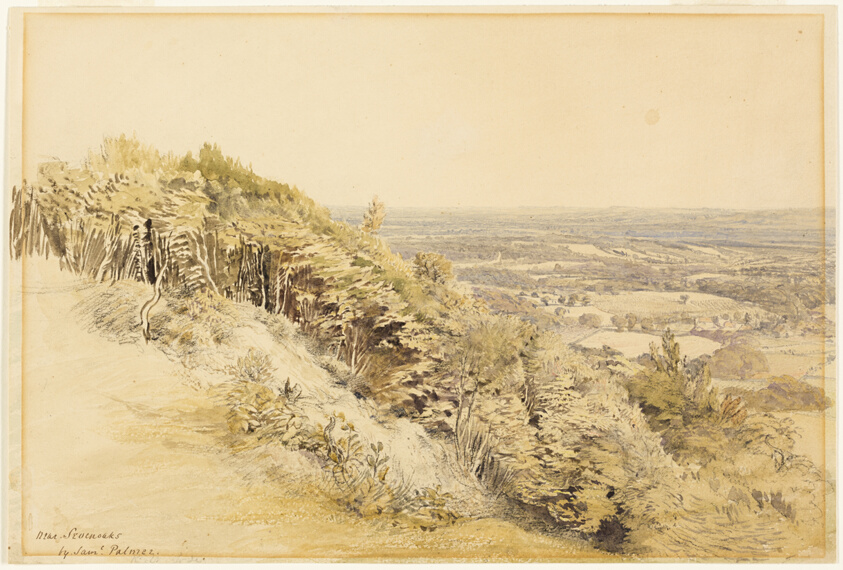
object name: Drawing and Watercolor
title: View from Wilmots Hill, Kent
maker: Samuel Palmer (English, 1805-1881)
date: 1830/1835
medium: Watercolor over black chalk on cream wove paper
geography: England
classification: watercolor; drawings (visual works); prints and drawing